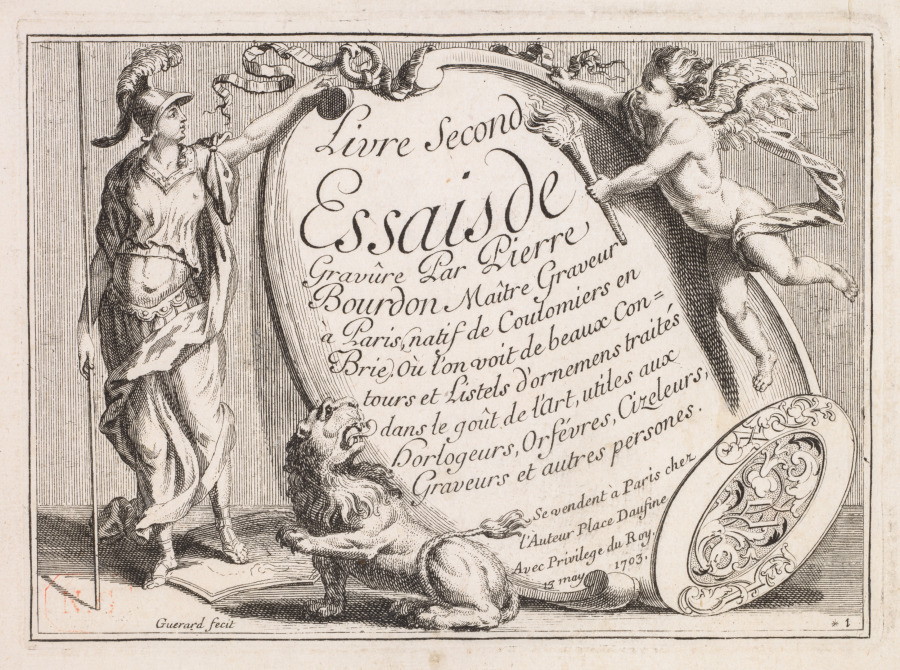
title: Goldsmith Design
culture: France, 18th century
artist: Pierre Bourdon (French)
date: c. 1703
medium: etching and engraving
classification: Print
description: The title page for this set of prints suggests that Bourdon’s designs are “useful for clockmakers, goldsmiths, chiselers, engravers and other people.” These craftsmen who made ornamented objects, such as the boxes and pistol below, sometimes consulted printed designs for inspiration. However, pattern prints similar to Bourdon’s also catered to aristocrats and wealthy professionals who pursued knowledge about styles and artists as a form of entertainment.